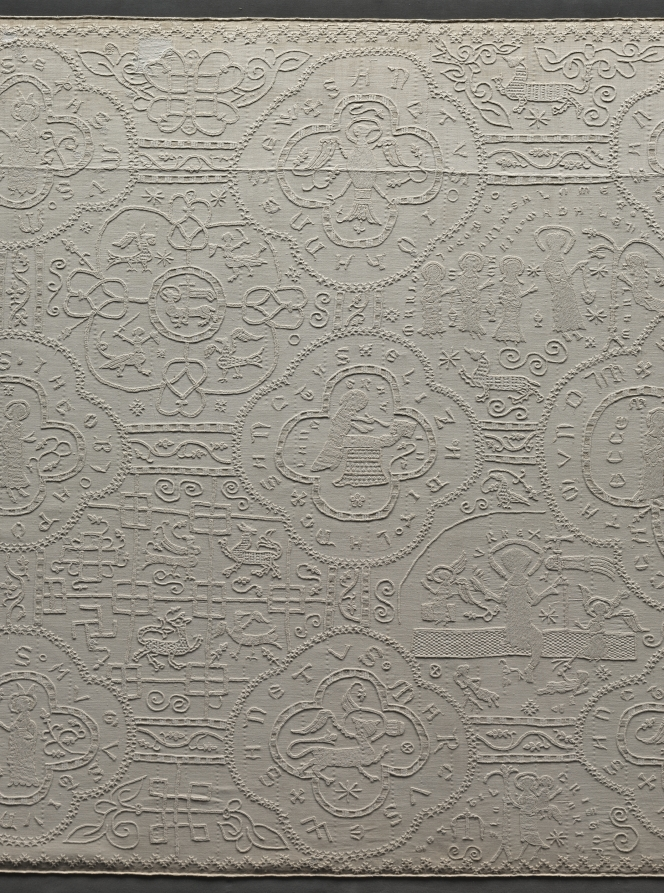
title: Altar Cloth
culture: Germany, Altenberg on the Lahn, Premonstratensian Convent, 14th century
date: c. 1350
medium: embroidery: linen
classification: Embroidery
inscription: various motifs enclosed in quatrefoils with identifying inscriptions in Gothic letters.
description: This large, embroidered altar cloth is one of the rarest, most important medieval church furnishings in existence. It was stitched by nuns in the Premonstratensian Convent in Altenberg on the Lahn River, north of Frankfurt, Germany, and was used to cover the church’s high altar in the weeks leading up to Easter. The cloth is an example of linen embroidery, a specialty of German nuns in the later Middle Ages. The Altenberg monastery church once had valuable furnishings; the high altar retable (a decorated frame with sculptures and paintings on the top of an altar) has survived, the main parts of which are now in the Städel Museum in Frankfurt, Germany.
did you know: When lit from behind, the previously hidden details emerge and the complex design becomes evident.